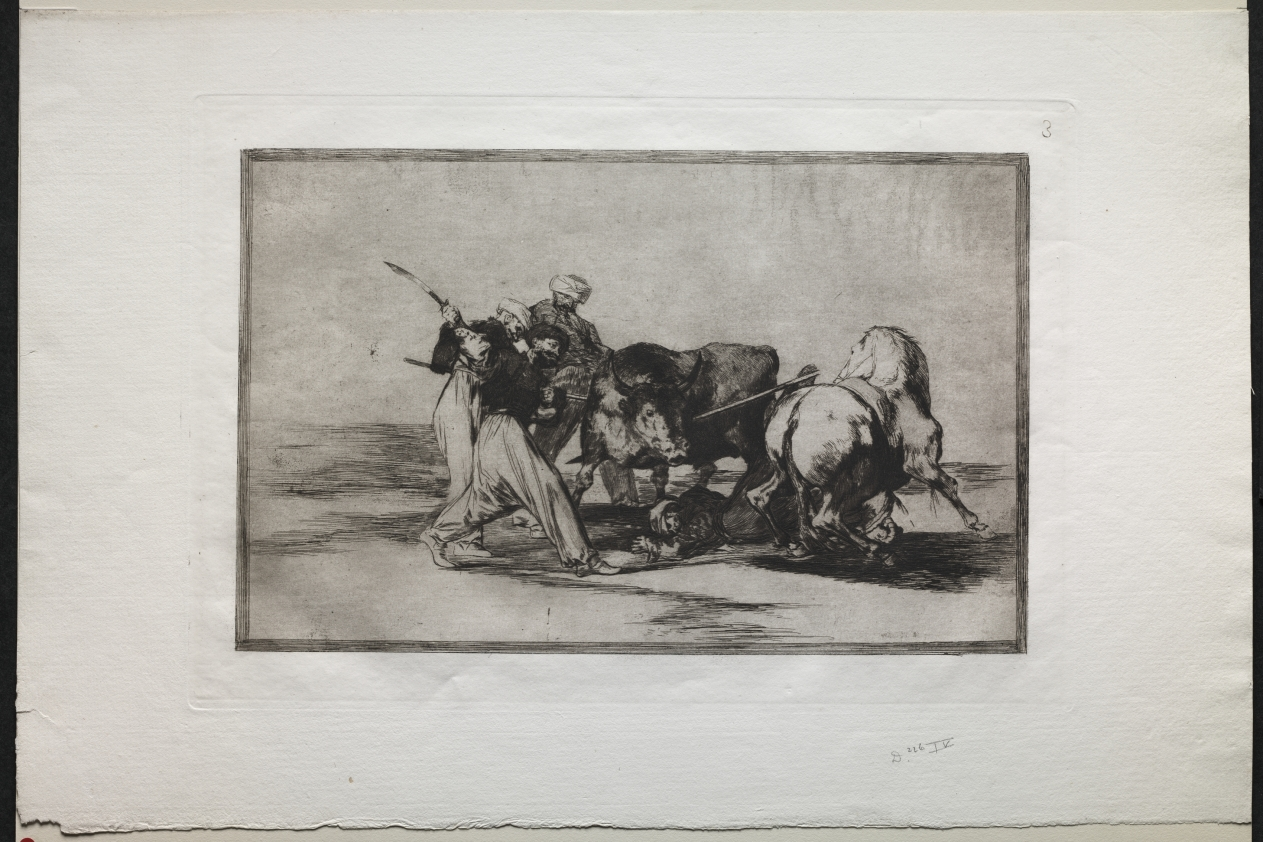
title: Bullfights: The Moors Settled in Spain, Giving Up the Superstitions of the Qur’an, Adopted this Art of Hunting, and Spear a Bull in the Open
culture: Spain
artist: Francisco de Goya (Spanish, 1746–1828)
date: 1816, printed 1876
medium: engraving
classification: Print